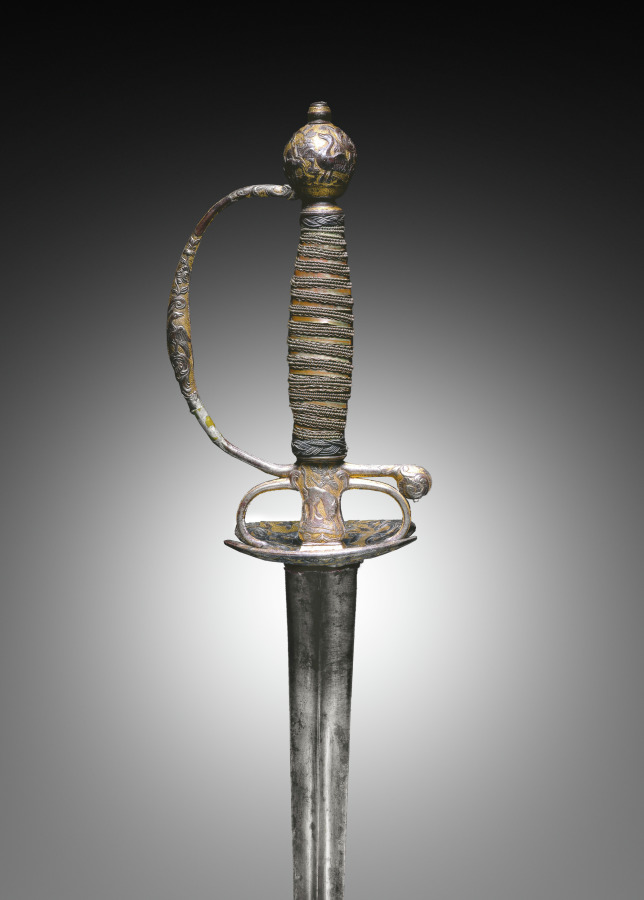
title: Small Sword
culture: France, Paris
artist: after a design by Jean-Baptiste Oudry (French, 1686–1755)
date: c.1750–60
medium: steel, gilt and russeted, copper, wood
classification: Arms and Armor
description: The hilt, pommel, and guard of this sword are richly chiseled in low relief against a stippled gold background with animals (dogs, a stag, ducks) that appear to be adapted from paintings by Jean-Baptiste Oudry (1686–1775). An elegant court sword such as this was an important accessory to a gentleman's attire, yet remained functional—it could be withdrawn for an impromptu duel.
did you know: Although fully functional, this sword was used more for show—a perfect accessory for a fashionable gentleman having his portrait painted.